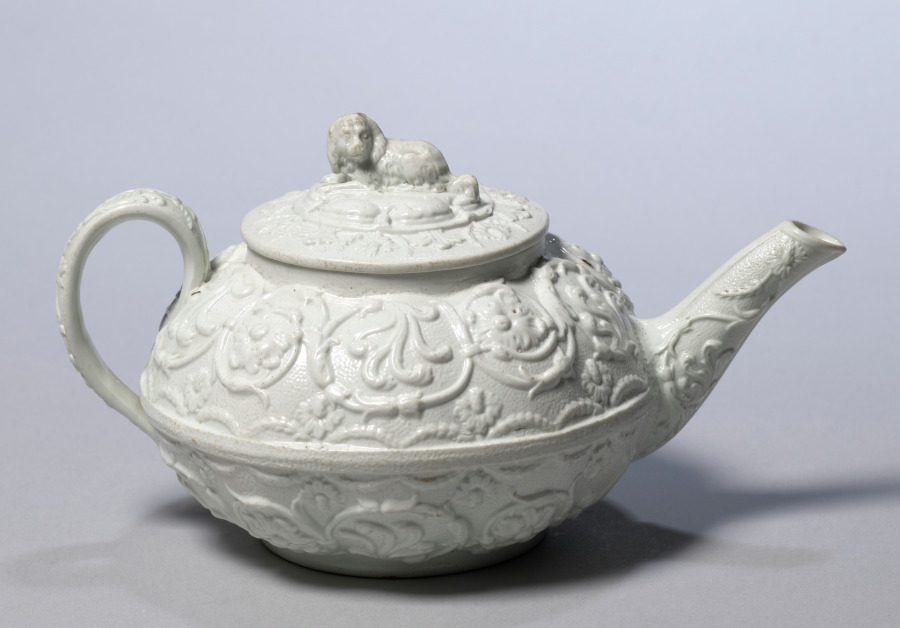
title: Teapot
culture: England, Staffordshire, 19th century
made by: Wedgwood Factory (British)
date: c. 1830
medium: stoneware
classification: Ceramic